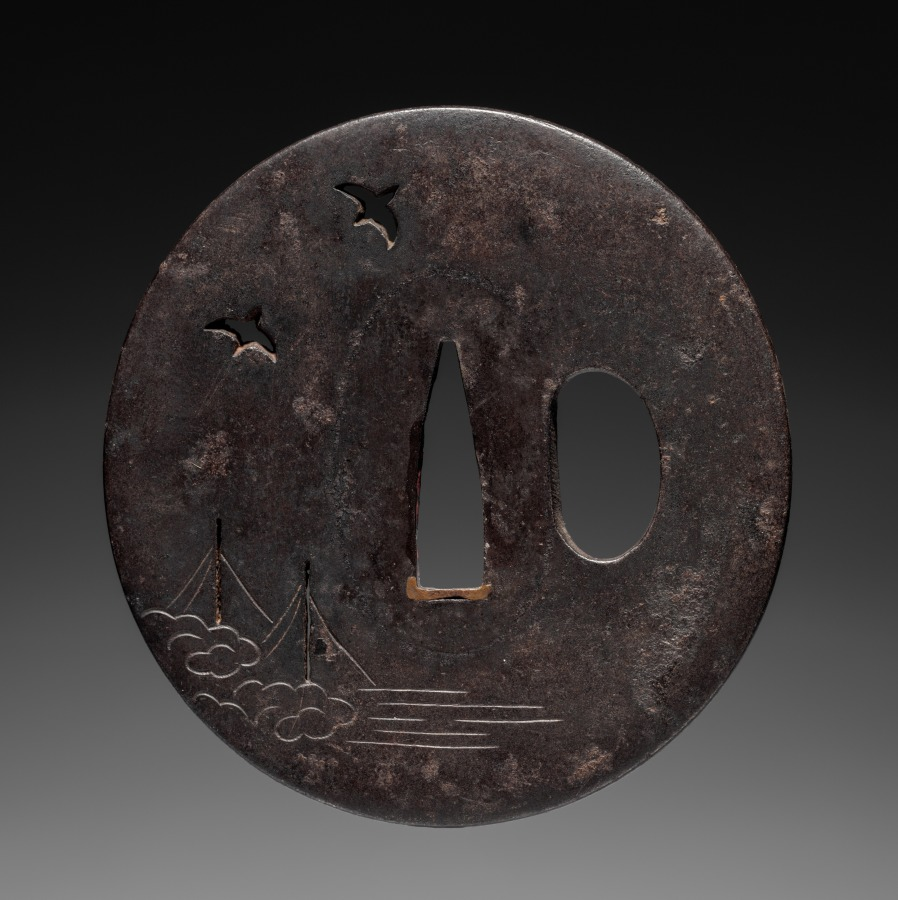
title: Sword Guard (Tsuba) with Birds and Sails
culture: Japan, possibly Edo period (1615-1868)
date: c. 1615–1868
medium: iron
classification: Arms and Armor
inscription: signed: 江府住之芳